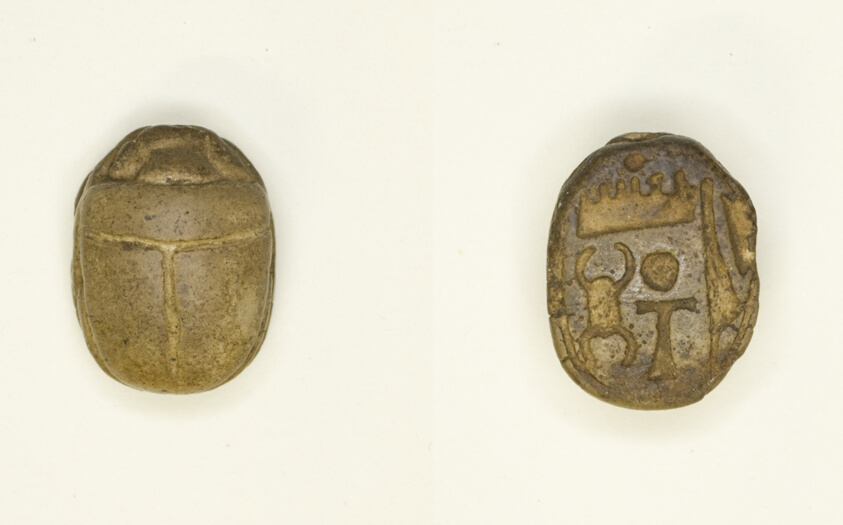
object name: Costume and Accessories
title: Scarab: Wish Formula of Amon-Re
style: middle kingdom, ancient, egyptian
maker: Egyptian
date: Middle Kingdom (1991–1720 BCE)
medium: Ceramic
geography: Egypt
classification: scarab; ancient art; costume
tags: Hieroglyphs, insects